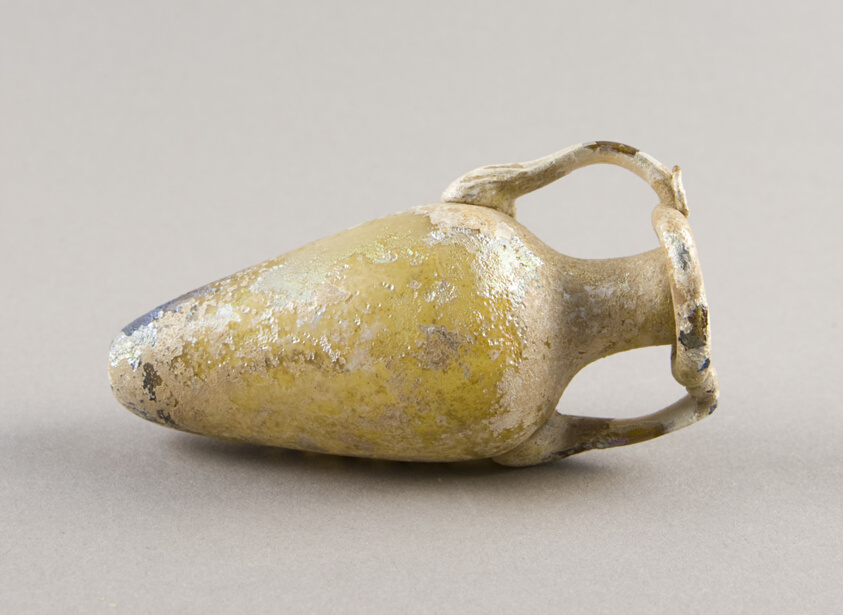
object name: Vessel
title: Amphoriskos (Container for Oil)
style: palestinian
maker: Ancient Mediterranean; Levant or Palestine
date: 3rd-5th century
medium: Glass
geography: Palestine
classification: glass; vessel; ancient art